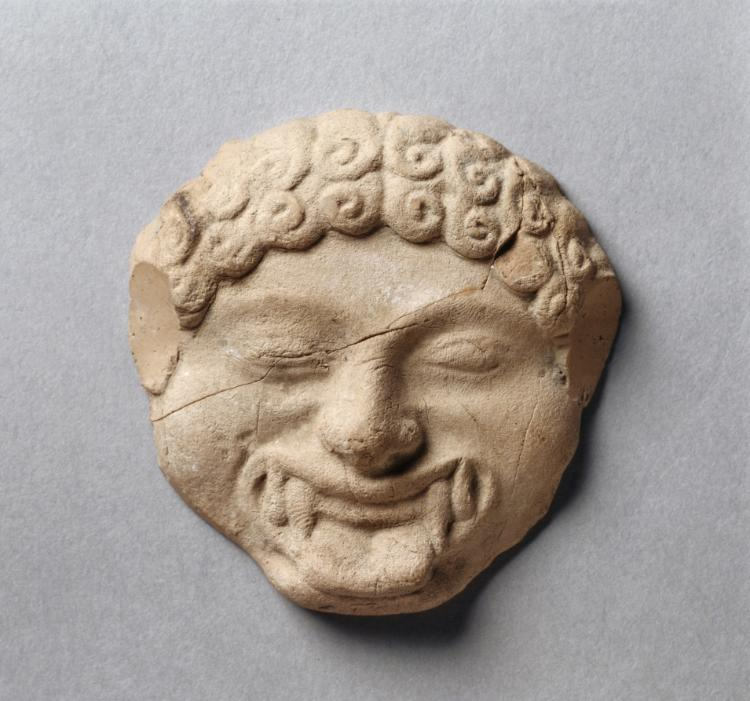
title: Gorgoneion Plaque with Incised Figure of a Dancing Satyr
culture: Greece, South Italy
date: c. 525–475 BCE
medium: terracotta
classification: Sculpture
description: Probably meant to decorate the outside of a wooden coffin or other tomb furniture, this small mold-made terracotta plaque is one of two in the collection (click here for the other). Both bear gorgoneia, or frontal Gorgon faces, with snaky hair, sharp teeth, and protruding tongue, perhaps meant to ward off evils. Curiously, this plaque also features decoration on its back side, in the form of a spirited dancing satyr incised into the clay before firing. Since this satyr would not have been visible once the plaque was in place, its purpose is uncertain. Was it simply diversion for the artisan who made it, or meant to protect the spirit of the deceased?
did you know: This plaque includes a very rare ancient sketch: a satyr incised on the reverse surface.